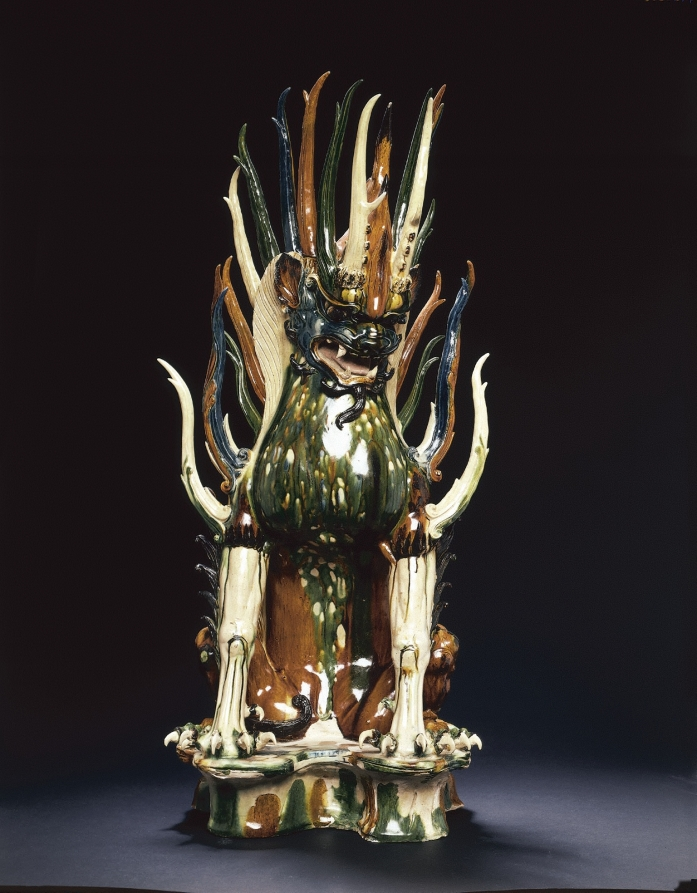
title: Tomb Guardian with Animal Head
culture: China, probably Shaanxi province, Xi'an, Tang dynasty (618-907)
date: early 700s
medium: glazed earthenware, sancai (three-color) ware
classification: Ceramic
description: With their fierce expressions and exaggerated physical features, fantastic guardian creatures were intended to guard the entrance to a tomb, warding off evil as well as keeping the soul of the deceased from wandering. Known as "earth spirits" or qitou, this one has an animal face and a pair of antlers growing above its eyebrows; the other sports a human face with huge protruding ears and a short horn surrounded by fiery, twisting hair. Their many elongated spikes heighten the fearful intensity. Before tomb sculptures were placed in the tomb, they were carried through the streets in a funerary procession. Funerary gifts provided the deceased with means for the afterlife. They were also an expression of filial piety and demonstrated the wealth and power of the descendants.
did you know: Sancai (three-color) glazes in green, amber, and transparent white, plus expensive cobalt blue glaze, show the high social status of the tomb’s occupant.